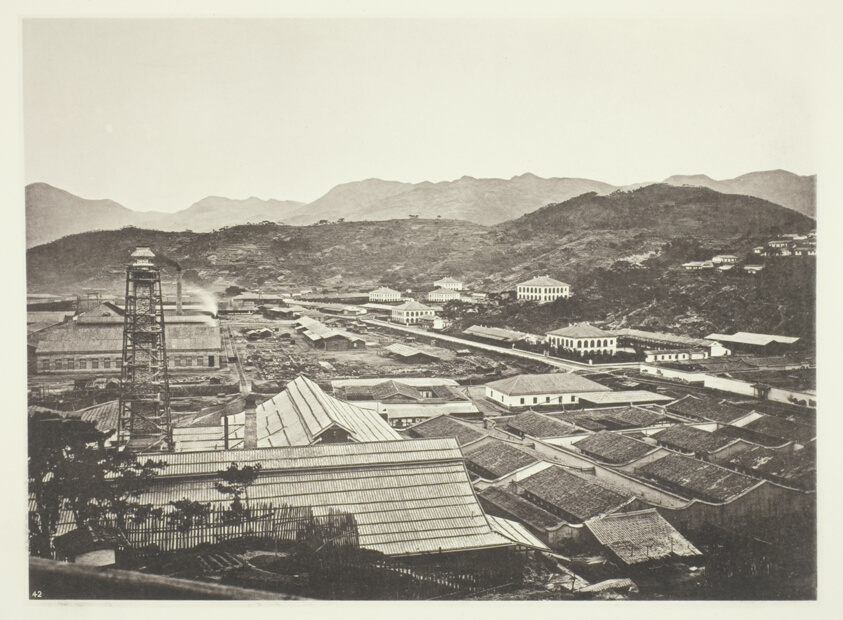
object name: Photograph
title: Foochow Arsenal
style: 19th century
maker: John Thomson (Scottish, 1837–1921)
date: c. 1868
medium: Collotype, pl. XV from the album "Illustrations of China and its People, Volume II" (1873)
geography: Scotland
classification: photography; photograph